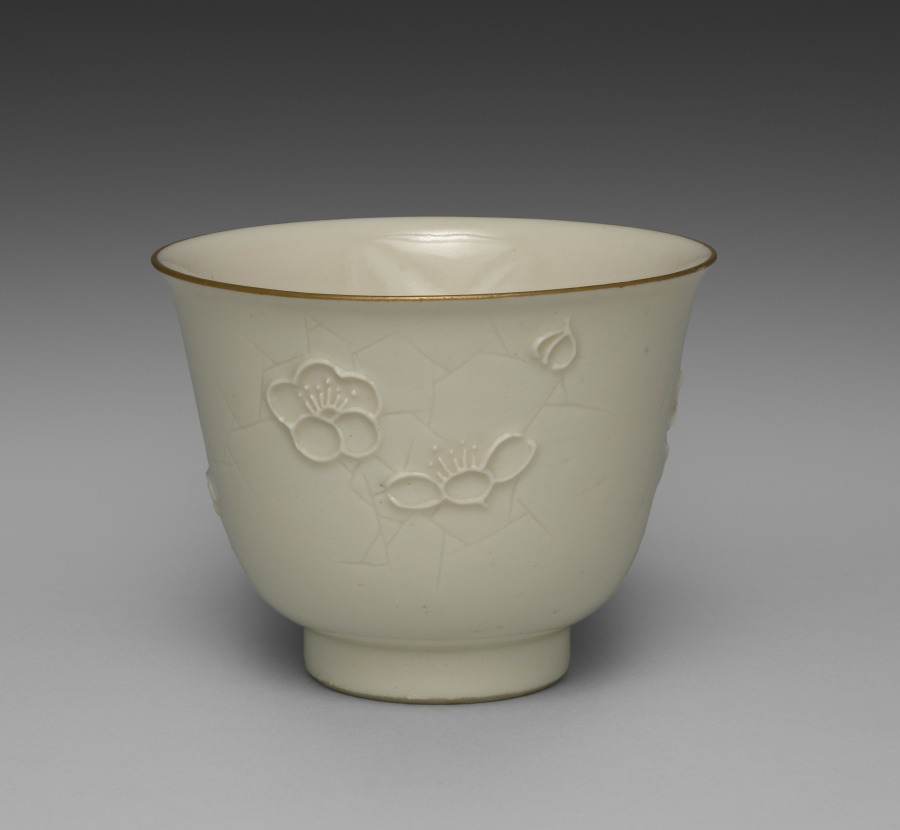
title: Drinking Cup from Dining Set with Plum Blossoms and Cracked-Ice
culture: Japan, Meiji period (1868–1912)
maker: Seifū Yohei II (Japanese, 1844–1878)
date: c. 1875–78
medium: Porcelain with molded designs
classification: Ceramic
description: Each item in this set has a delicate low-relief design of flowering plum branches over scattered, intersecting lines meant to resemble the cracked-ice surface of a frozen body of water and is signed on the base in gold pigment. While Yohei II produced many fine works in underglaze blue, like those produced by Kiyomizu Shichibei, he also made works in quite different styles later in his career, from the early 1870 s. In 1873, he was appointed purveyor to the Industrial Center of Kyoto Prefecture, a designation associated with Kyoto’s efforts to reach an international market through the port of Kobe; and from 1875 until his death, he was involved in national-level projects to present Japanese ceramics across the world. It was during this period that Yohei III was apprenticed to Yohei II, and it has been suggested that this set may in fact be an early example of Yohei III’s work, which he signed with his teacher’s name. Decorated with flowers resembling Japanese textile motifs, the set calls to mind the design of Yohei II’s pair of vases with plum blossoms in the Victoria and Albert Museum. Here, the elaborate trees created for a formal public exhibition setting have been translated into the approachable blossoms of the genteel domestic environment. While the designs are consistent across the pieces, each raised flower petal and pistil and each incised line in the ice was done by hand, so the cups, bowls, and dishes are similar yet unique. The bottoms of two boxes once identified the set’s owner, but the information has been deliberately obscured with black ink. However, inscriptions still visible appear to indicate two occasions, once at the end of July 1886 , and once again in June 1916 , when parts of the set were requested from Hokura in Niigata Prefecture. The location corresponds to a neighborhood in the present-day city of Jōetsu. The surname Tsuji 辻 also appears on a paper tag affixed to one of the box cloths. Future research may possibly reveal more about their provenance. A vase by Yohei III in a private collection combines the formal grandeur of the Yohei II vases in the Victoria and Albert Museum with the gentler design of this dining set, placing flowering plum trees against soft, scalloped-edge clouds resembling those in golden screens.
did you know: The dining wares have a creamy white coloration that the four boxes containing them identify as Korean in style.